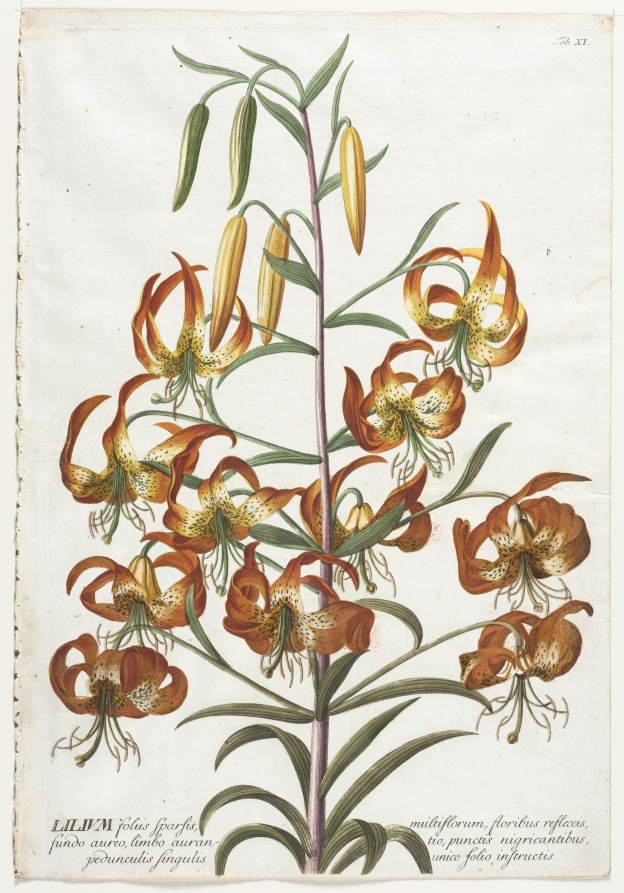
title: Plantae Selectae: No. 11 - Lily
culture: Germany, 18th century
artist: Georg Dionysius Ehret (German, 1708–1770)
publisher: Christopher Jacob Trew (German, 1695–1769)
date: published 1750–73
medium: engraving, hand-colored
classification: Print